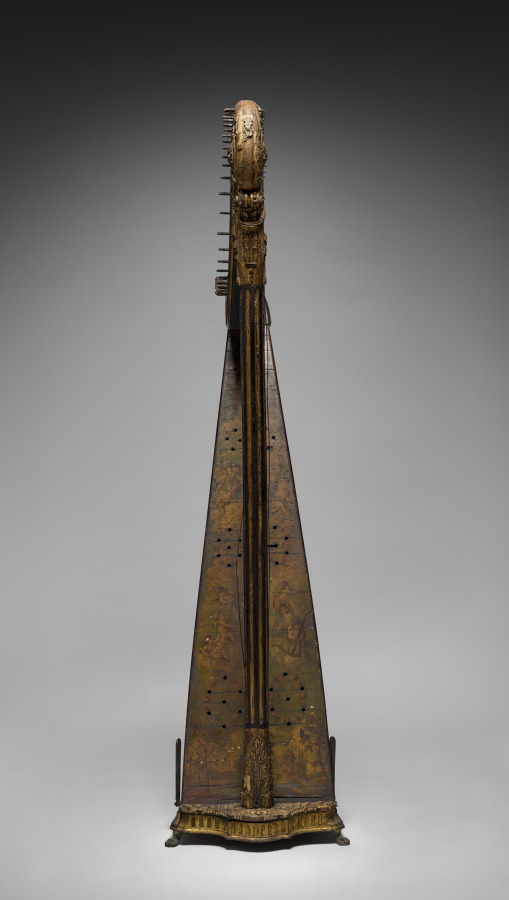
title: Harp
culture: France, 18th century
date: 1700s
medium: wood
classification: Musical Instrument